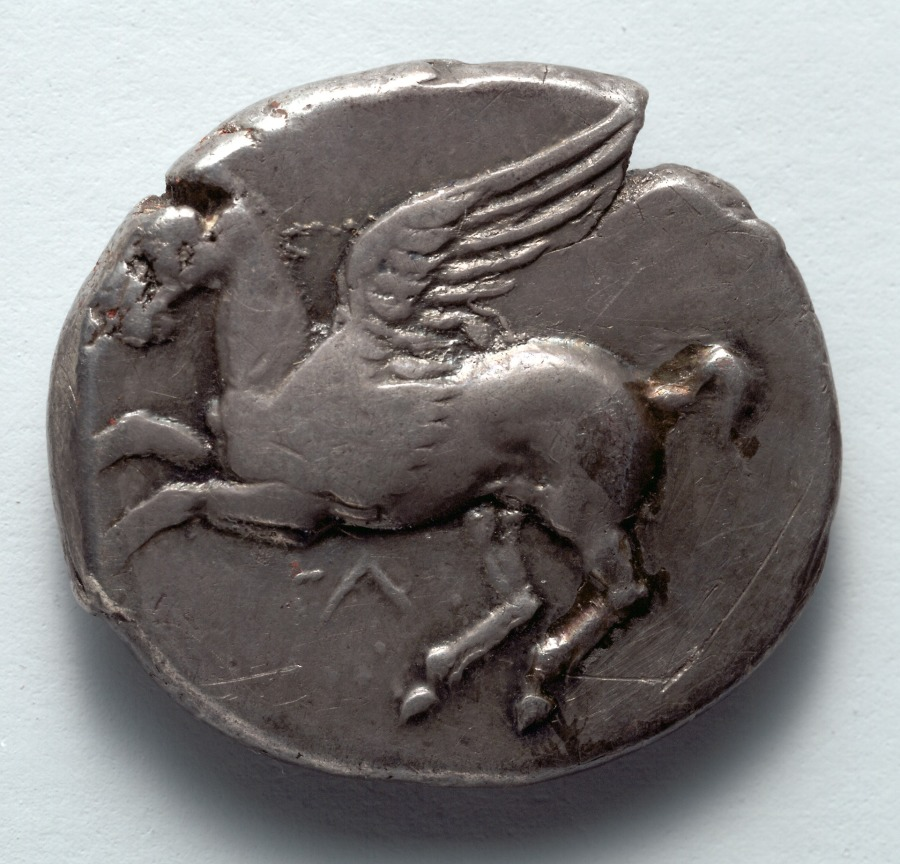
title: Stater: Pegasos (obverse); Head of Athena (reverse)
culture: Greek, minted at Leukas (Akarnania)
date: c. 350–300 BCE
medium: silver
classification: Coins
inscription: Λ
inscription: Λ